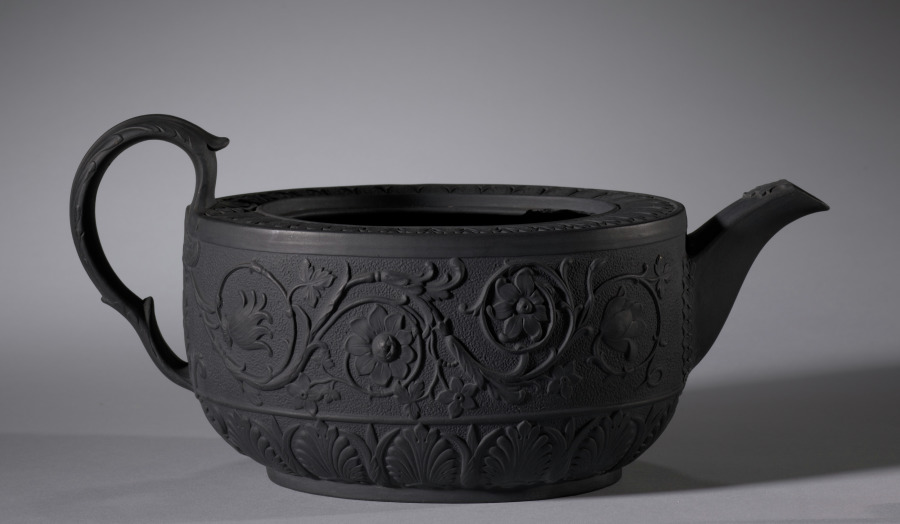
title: Teapot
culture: England, 19th century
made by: Elijah Mayer & Son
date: c. 1810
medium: black basalt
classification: Ceramic